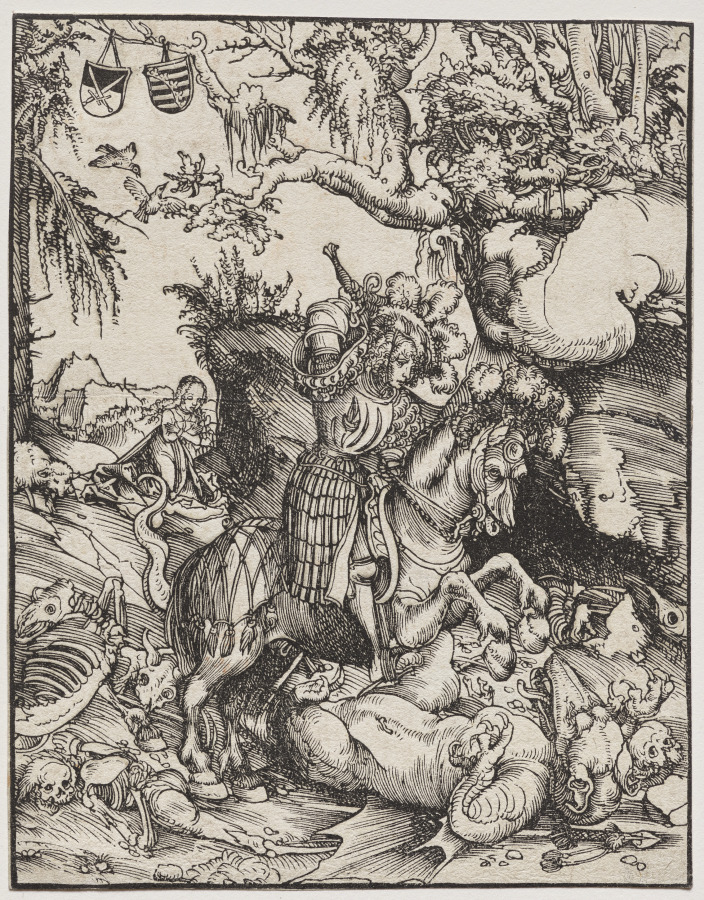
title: Saint George Slaying the Dragon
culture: Germany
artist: Lucas Cranach (German, 1472–1553)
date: c. 1510–1515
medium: woodcut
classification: Print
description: In 1505, Cranach became court painter to Friedrich the Wise, Elector of Saxony, who encouraged the production of prints because they promoted the artistic and intellectual vitality of his court and the magnificence of its patronage. The Holy Roman emperor Maximilian did the same, making aristocratic sponsorship of printmaking a critical factor in the rising status of the woodcut. Cranach-together with Albrecht Dürer in Nuremberg and Hans Burgkmair in Augsburg (both on view nearby)-elevated the Northern woodcut to the highest level of artistic expression in the first decade of the 16th century. Friedrich's coat of arms (crossed swords) and the arms of Saxony appear prominently on most of Cranach's prints, suggesting that the artist worked under a kind of retainer-though the arms may also have operated somewhat like a privilege, an exclusive authorization to publish prints under Friedrich's legal protection.